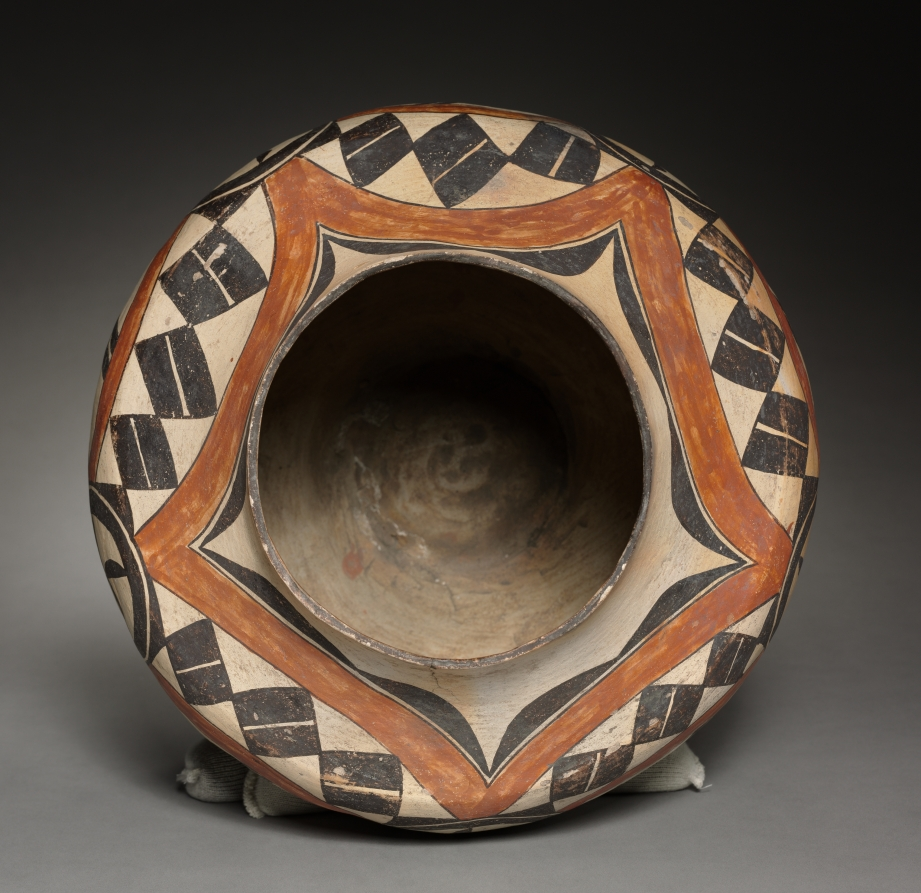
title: Jar (Olla)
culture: Southwest, Pueblo, Acoma, Laguna, Post- Contact Period,19th century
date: 1875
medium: pottery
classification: Ceramic